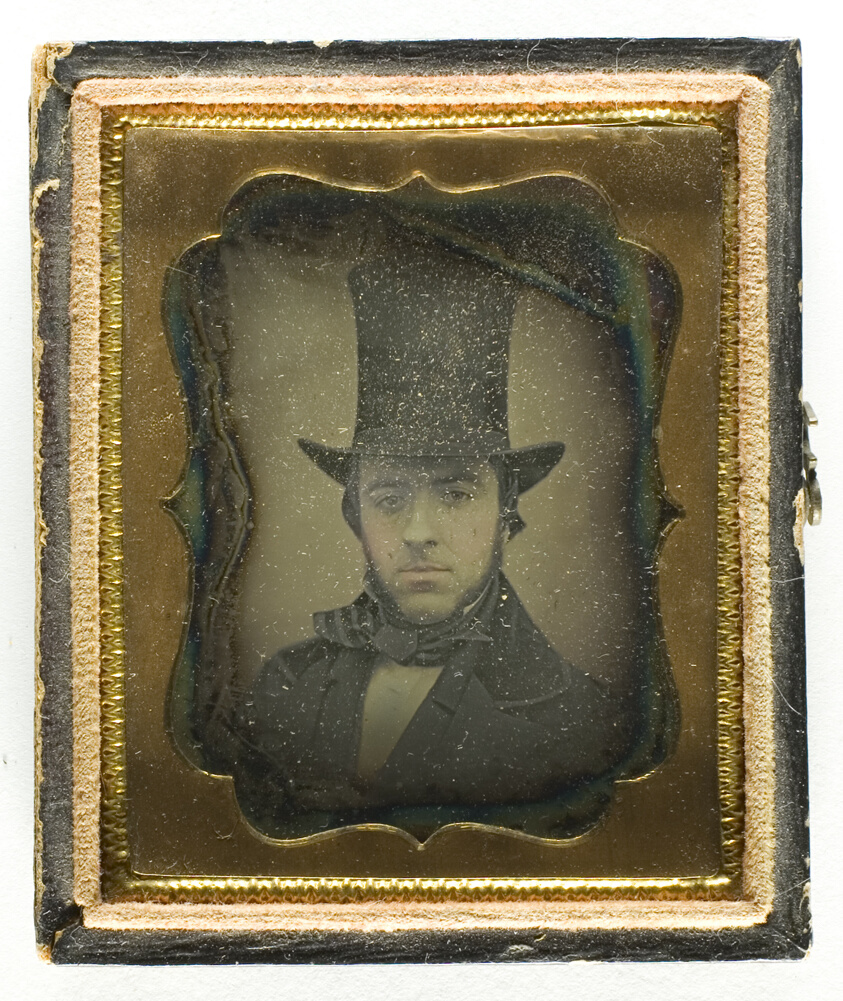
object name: Photograph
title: Untitled (Man in Top Hat)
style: 19th century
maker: Artist unknown; American, 19th century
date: 1845/65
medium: Daguerreotype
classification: portrait; photograph; photography; portrait; daguerreotype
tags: portraits